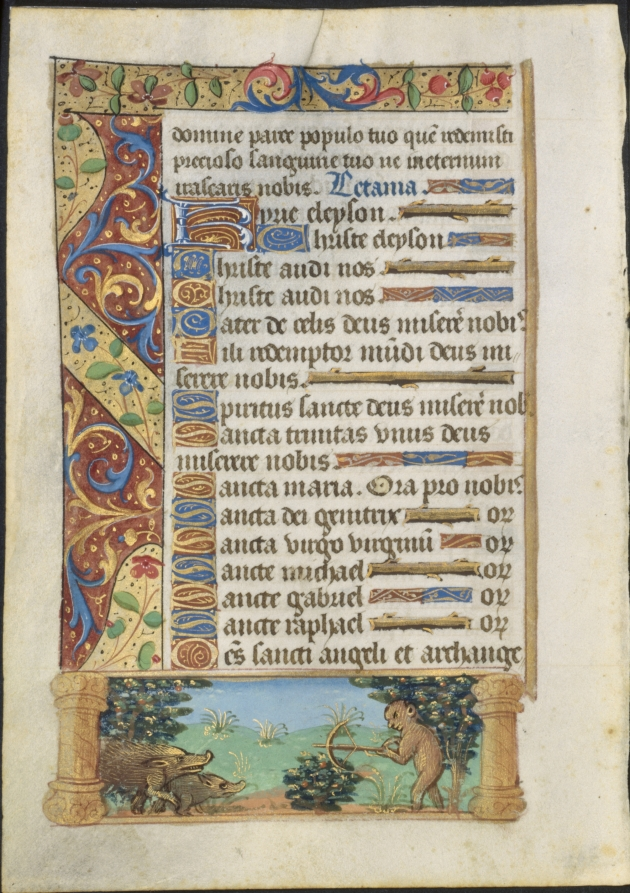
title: Leaf from a Book of Hours: Ape Hunting Wild Boars (recto)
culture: France, Paris or Rouen, 16th century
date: c. 1500–1510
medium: ink, tempera and liquid gold on vellum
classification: Manuscript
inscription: Letania Kyrie eleyson. Christe eleison. Christe audi nos. Christe audi nos. Pater de caelis Deus, miserere nobis. Spiritus sancta Deus, miserere nobis. Sancta Trinitas unus Deus, miserere nobis. Sancta Maria, ora pro nobis. Sancta Dei genitrix, ON. Sancta virgo virginum. ON. Sancte Michael, ON. Sancte Gabriel ON. Sancte Raphael ON. Oes sancti angeli et archangeli…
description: Following the psalms is the litany of saints, identified by the blue text reading Letania. This repetitive list proceeds through a hierarchy beginning with God the Father and continuing through many saints. From each individual, the reader could ask for forgiveness. This list was customizable, allowing the reader to include saints important to them or their family. Surrounding the text is a scene of an ape hunting wild boars, symbols of vice and lust, that could perhaps be from a fable or merely be amusing or diversionary.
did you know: The ape and the wild boar symbolized vice in general and lust in particular during the Middle Ages.